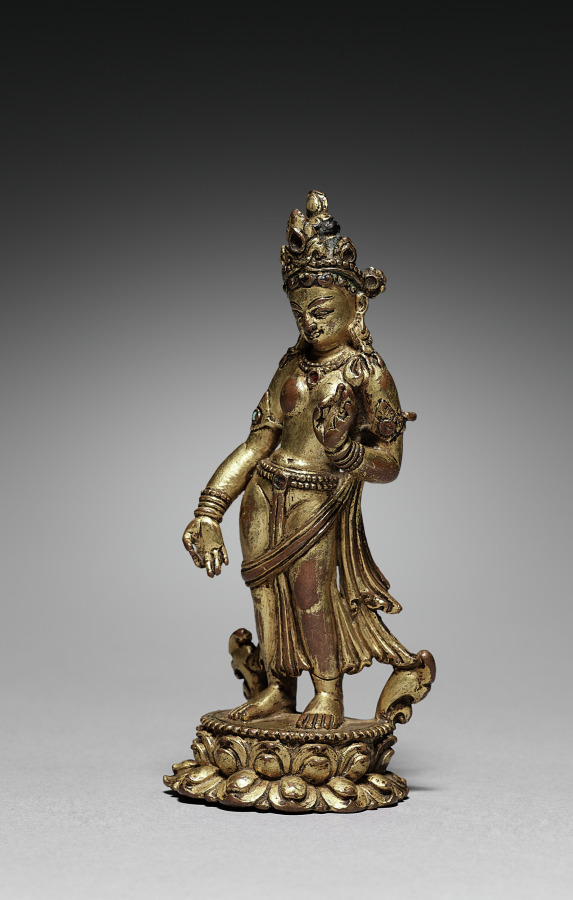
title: Standing Tara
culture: Nepal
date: 1300s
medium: bronze, gilded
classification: Sculpture